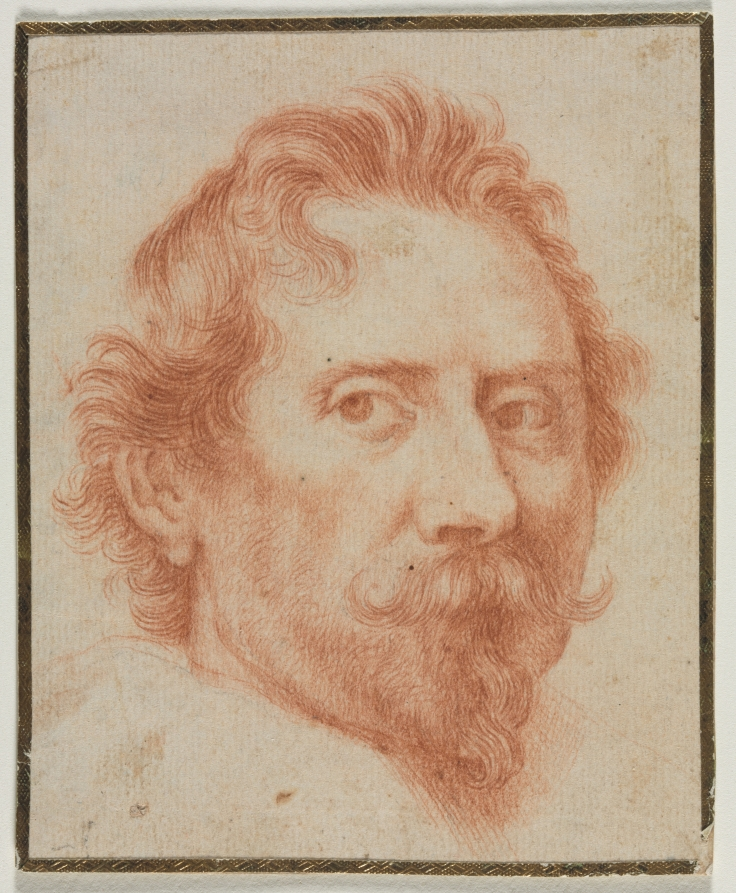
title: Copy of Van Dyck's Déodat Delmont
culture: Flanders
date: 1700s(?)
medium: red chalk over traces of black chalk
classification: Drawing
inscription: VERSO OF SECONDARY SUPPORT, across top, in graphite [?]: fecit [?] van Dyck [Joseph ?] J [illegible] ; in bottom half, in graphite [?]: van Dyck [underlined] [fecit?] ; lower center, in graphite: 3081